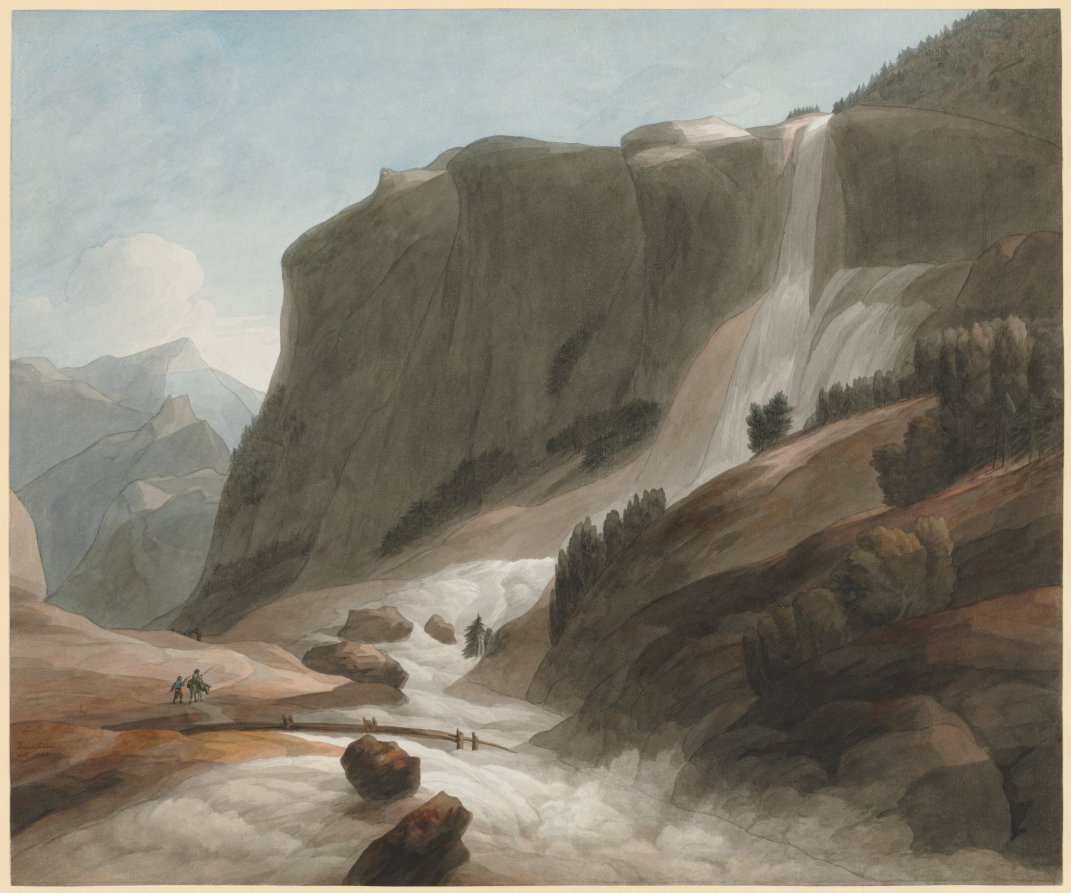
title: Waterfall between Chiavenna and Mount Splügen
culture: England, 18th century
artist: Francis Towne (British, 1739/40–1816)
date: 1784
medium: watercolor with graphite, point of brushwork, and selective glazing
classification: Drawing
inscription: signed and dated, in pen and brown ink, at lower left: Francis Towne / dell. 1784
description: Francis Towne spent a year painting the architectural wonders of Rome and its environs on what was to be his only trip to the Continent. On the journey back to England, he traveled over the Alps, visiting the Italian Lakes, crossing over the Splügen Pass into Switzerland, finally arriving in Geneva. His distinctive style, characterized by an austere simplicity of vision, found its fullest expression in his Alpine views, described by one scholar as "unquestionably among the greatest by any 18th-century artist of mountain scenery." Against the earth tones of the brooding cliffs, the crash of the waterfall is like a white explosion.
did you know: This drawing once belonged to Paul Oppé, one of Britain's most esteemed art historians and a legendary authority on English drawings.